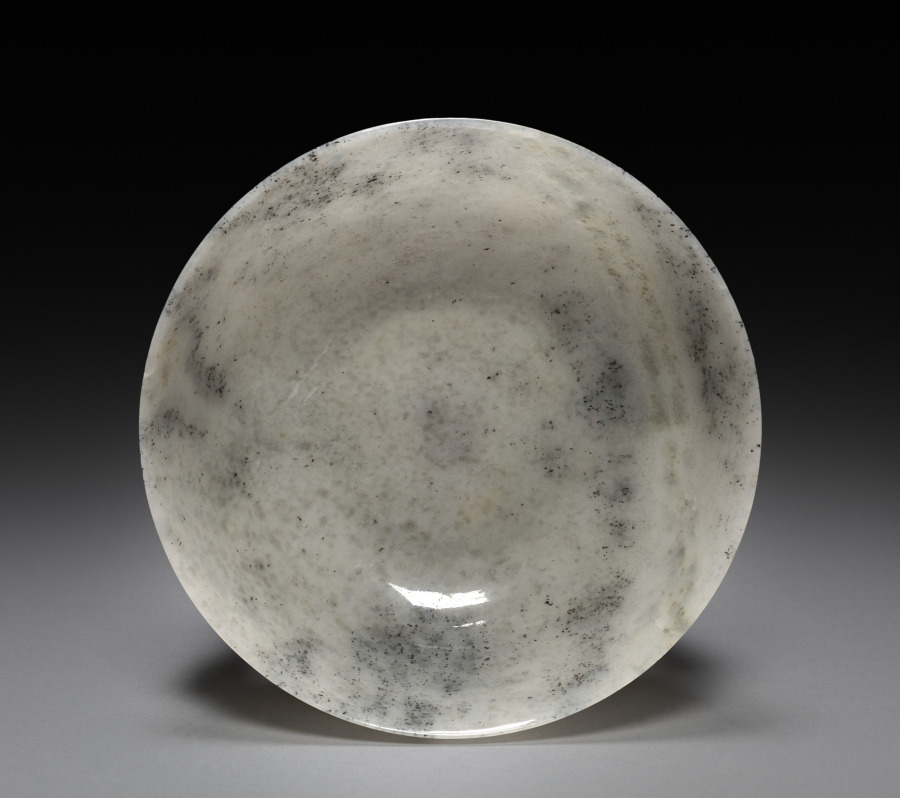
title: Bowl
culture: China, Qing dynasty (1644-1911), Qianlong mark and reign (1736-95)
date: 1736–95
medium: jade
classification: Jade